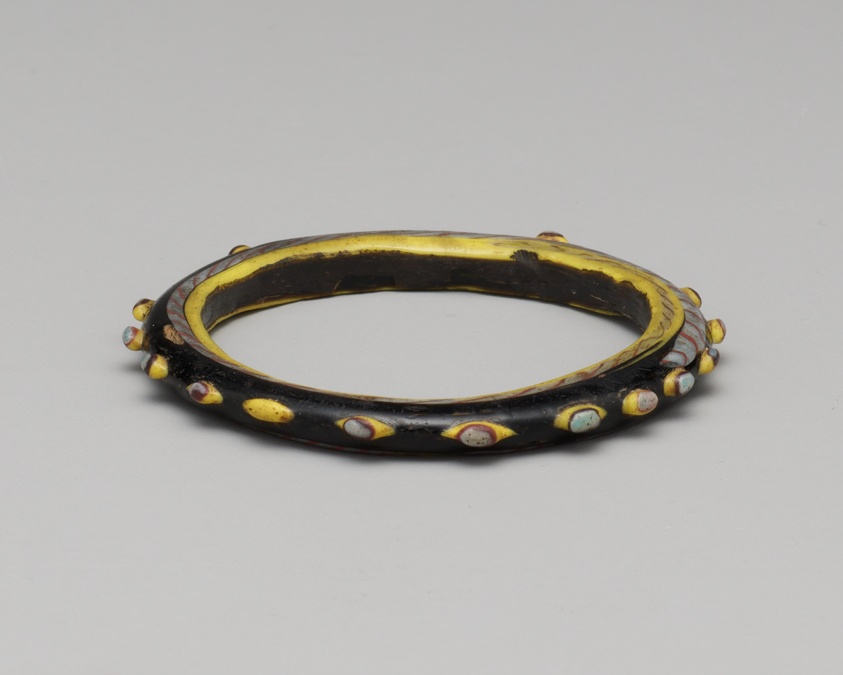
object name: Costume and Accessories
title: Bracelet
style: greco-roman (egyptian)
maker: Islamic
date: 14th-15th century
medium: Glass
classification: glass; jewelry; ancient art; costume